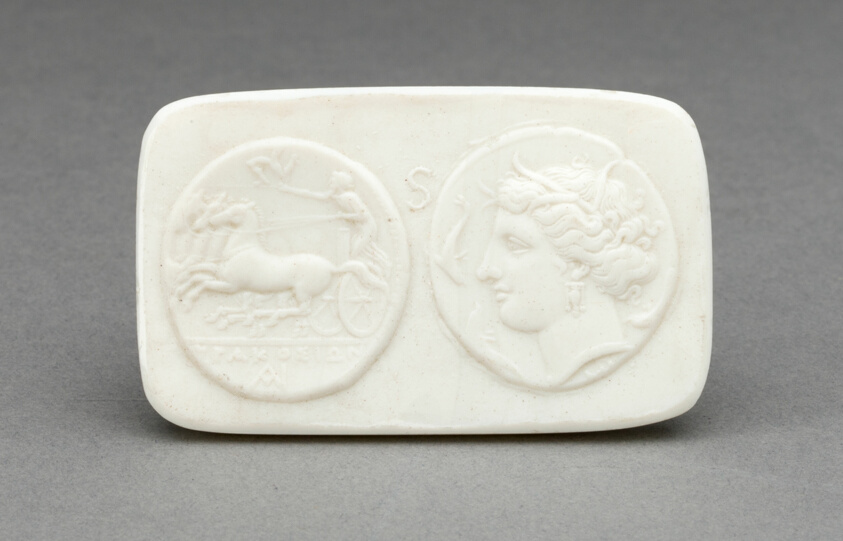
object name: Ceramics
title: Medallion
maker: Wedgwood Manufactory; England, founded 1759; Designed by Tassie, James; Scottish, 1735-1799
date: Early 19th century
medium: Stoneware (jasperware)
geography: Burslem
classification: sculpture; stoneware; european decorative arts; ceramics